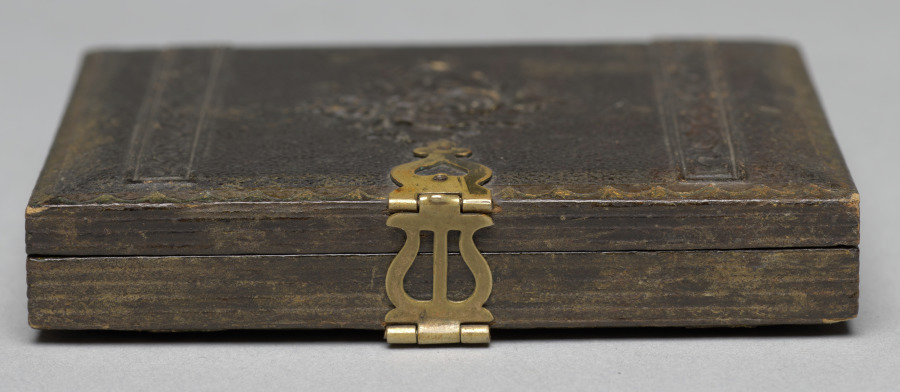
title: Poodle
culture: America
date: c. 1861–63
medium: ambrotype, tinted, sixth plate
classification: Photograph